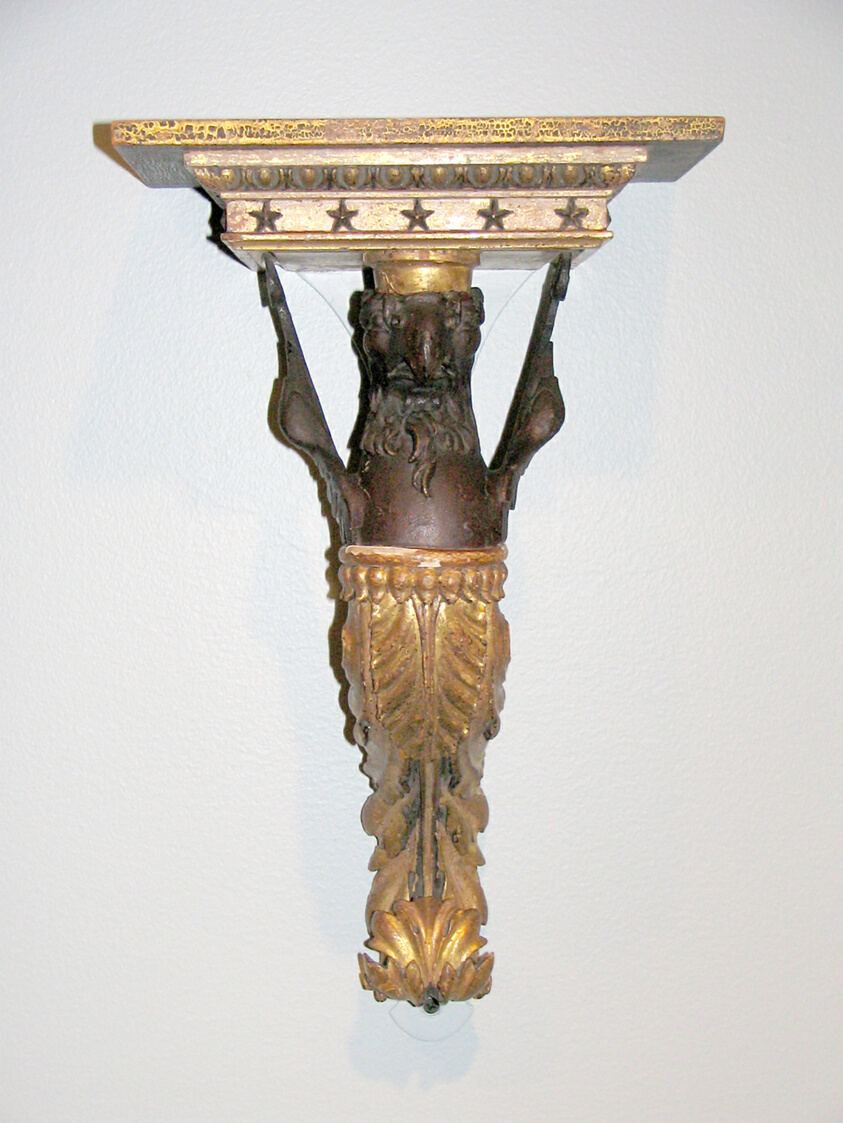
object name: Furniture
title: Wall Bracket with Griffin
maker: Artist unknown (American, 18th–19th century)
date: c. 1800–25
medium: Mahogany, white pine, and basswood with paint and gilding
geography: United States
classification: furniture accessory; american decorative arts; american arts; furniture